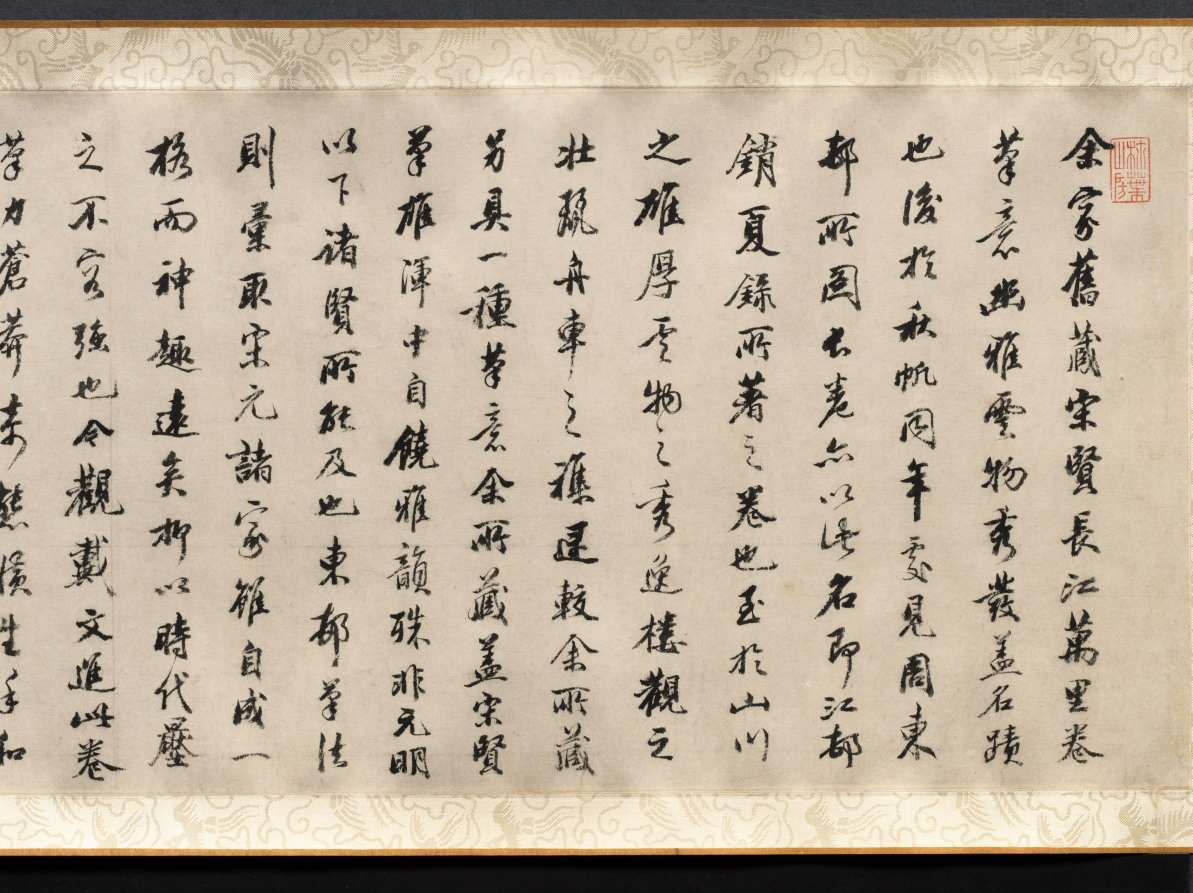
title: Ten Thousand Li of the Yangzi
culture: China, Ming dynasty (1368–1644)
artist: Dai Jin (Chinese, 1388–1462)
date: c. 1400s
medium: Handscroll; ink and color on paper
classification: Painting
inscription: Two colophons at end. Artist's seals: Dai Jin 戴進 and Wenjin 文進.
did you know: Dai Jin is traditionally considered the founder of the Zhe School, a style of landscape painting.